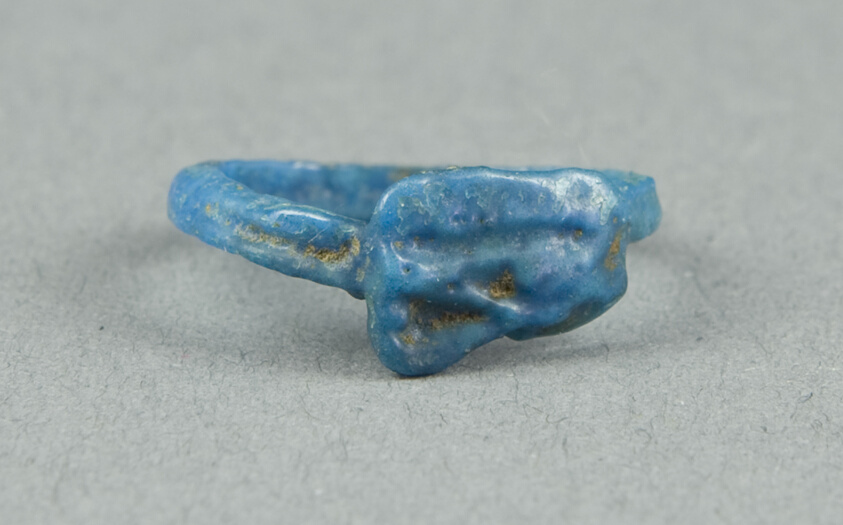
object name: Costume and Accessories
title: Eye of Horus (Wedjat) Finger Ring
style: new kingdom, egyptian, ancient, eighteenth dynasty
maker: Egyptian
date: New Kingdom, late Dynasty 18 (about 1325 BCE)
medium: Faience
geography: Egypt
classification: ring (jewelry); ceramics; jewelry; ancient art; costume; faïence (composite material)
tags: eye of Horus